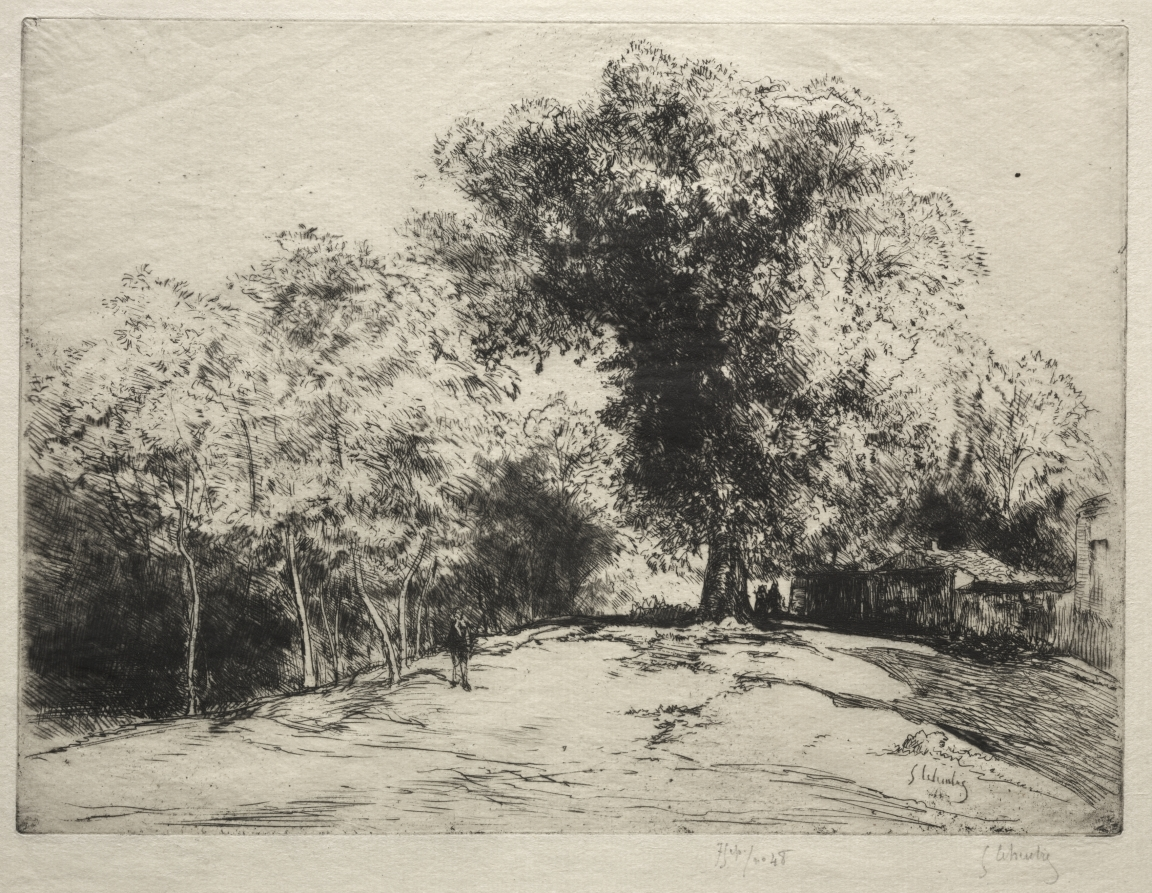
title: Le Chemin de ronde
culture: France, 19th century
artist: Gustave Leheutre (French, 1861–1932)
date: 1922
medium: etching and drypoint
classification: Print